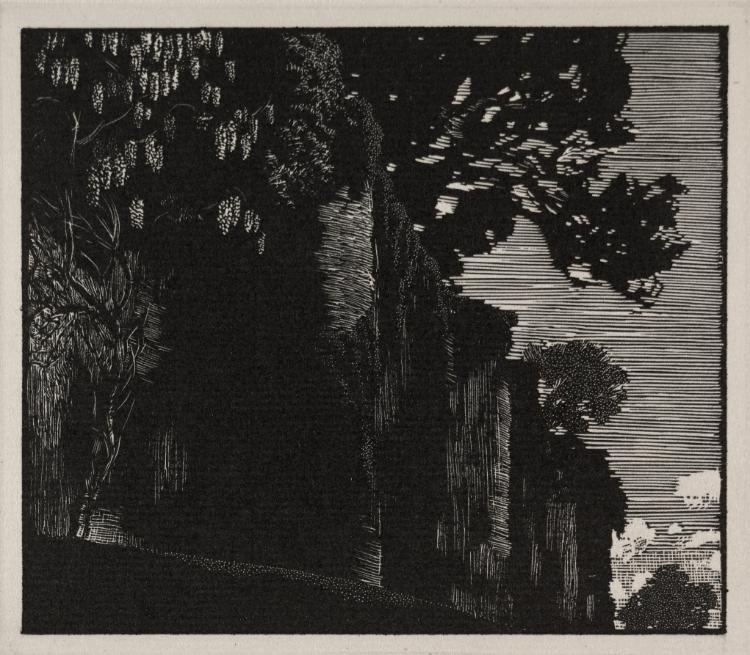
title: Arnheim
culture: America, Ohio, Cleveland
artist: Orville Houghton Peets (American, 1884–1968)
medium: woodcut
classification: Print